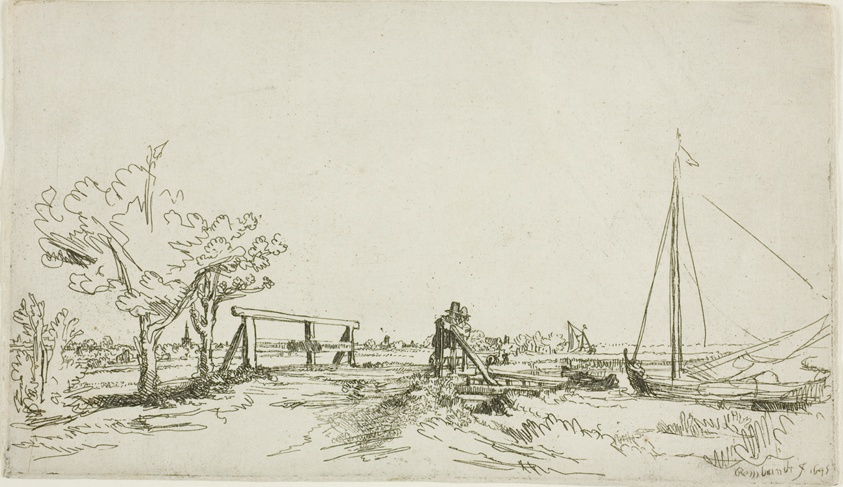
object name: Print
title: The Bridge at Klein Kostverloren on the Amstel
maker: Rembrandt van Rijn (Dutch, 1606-1669)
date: 1645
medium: Etching on ivory laid paper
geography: Holland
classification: etching; print; prints and drawing; paper